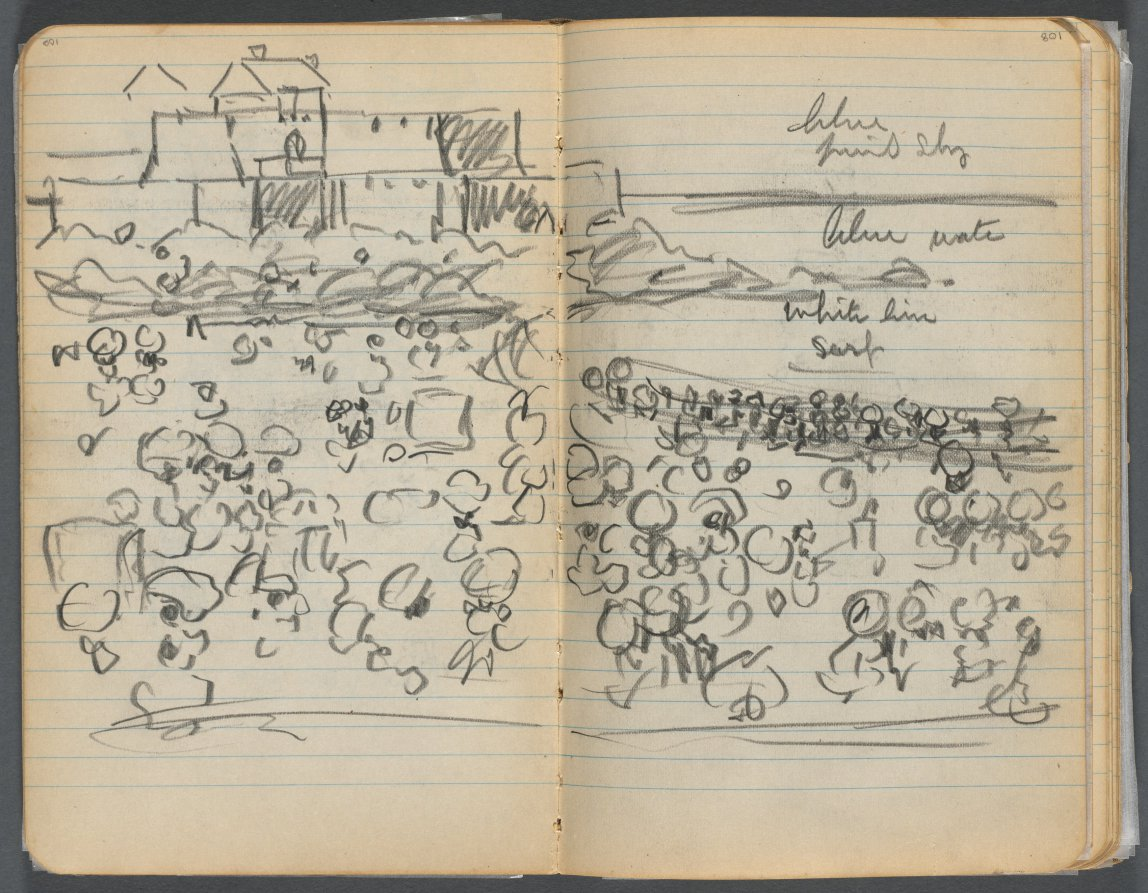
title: Sketchbook, page 108 &109: Beach View with color notations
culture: America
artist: Maurice Prendergast (American, born Newfoundland [now Canada], 1858–1924)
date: 1905–10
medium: graphite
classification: Bound Volume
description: This sketchbook contains 69 pages of drawings, a diary largely devoted to the state of the artist's health, and a three-page discourse on the nature of genius and ideas.